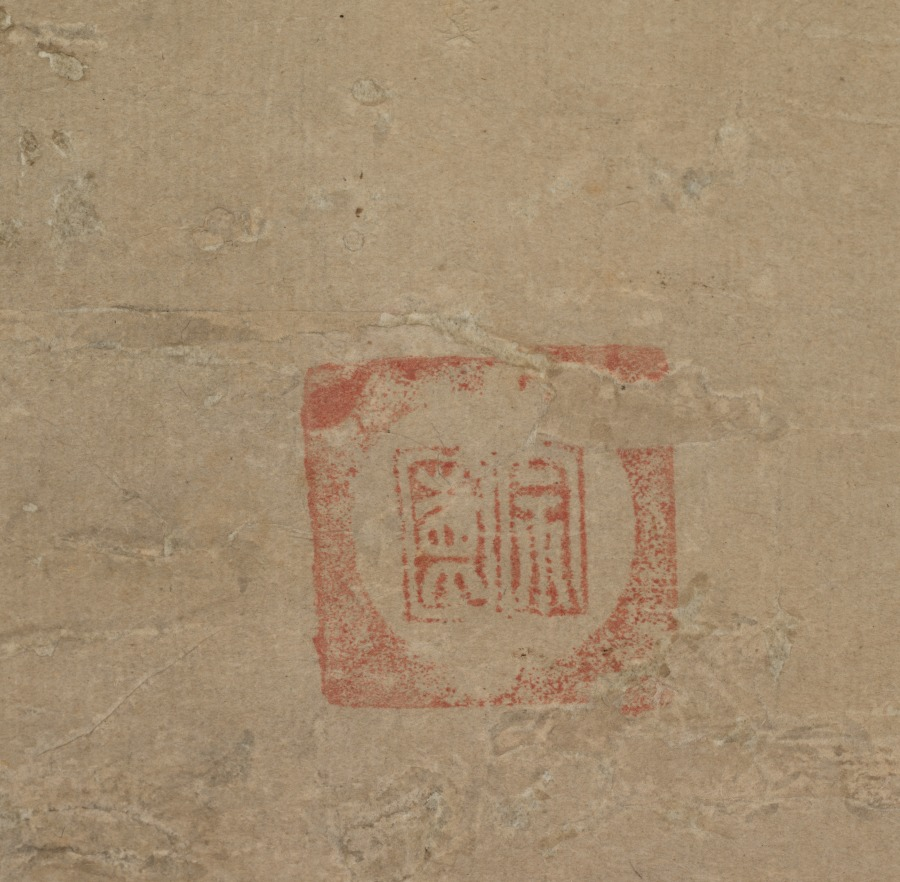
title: A Couple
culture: Japan, Momoyama period (1573–1615)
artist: Hasegawa Sōen (Japanese)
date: late 1500s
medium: hanging scroll; ink on paper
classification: Painting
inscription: Artist's seal at lower left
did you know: The person on the right holds a spray of chrysanthemums, while the other has daffodils suspended upside down from a stalk held over their shoulder.